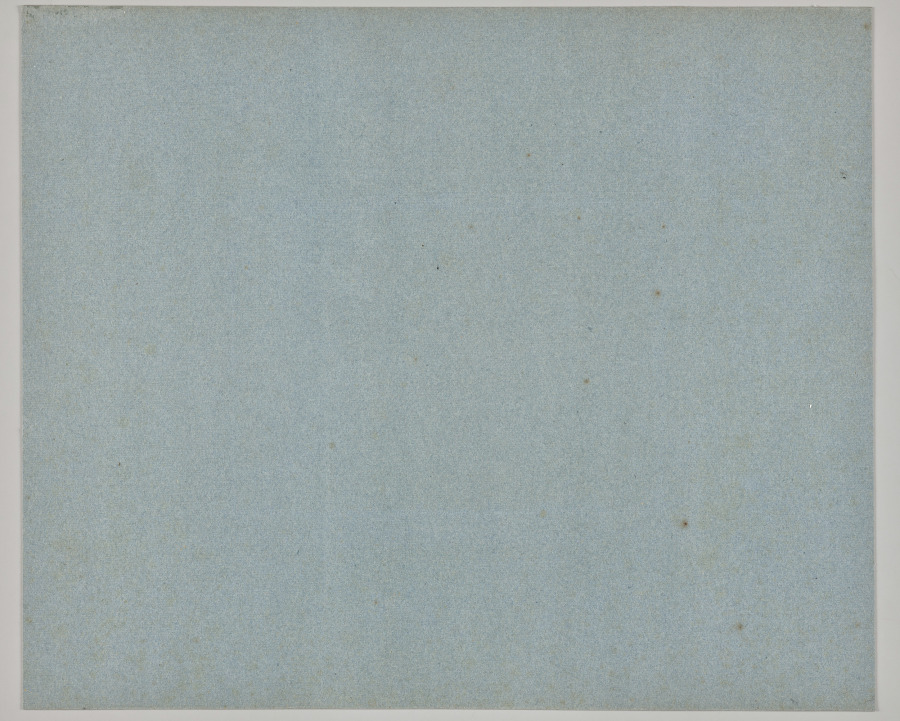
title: Monday. Rosenecker Garden in Front of Salzburg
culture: Germany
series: Seven Areas from Salzburg and Berchtesgaden. Arranged according to the seven days of the week, connected by two allegorical sheets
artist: Ferdinand Olivier (German, 1785–1841)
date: 1818–23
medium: lithograph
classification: Print